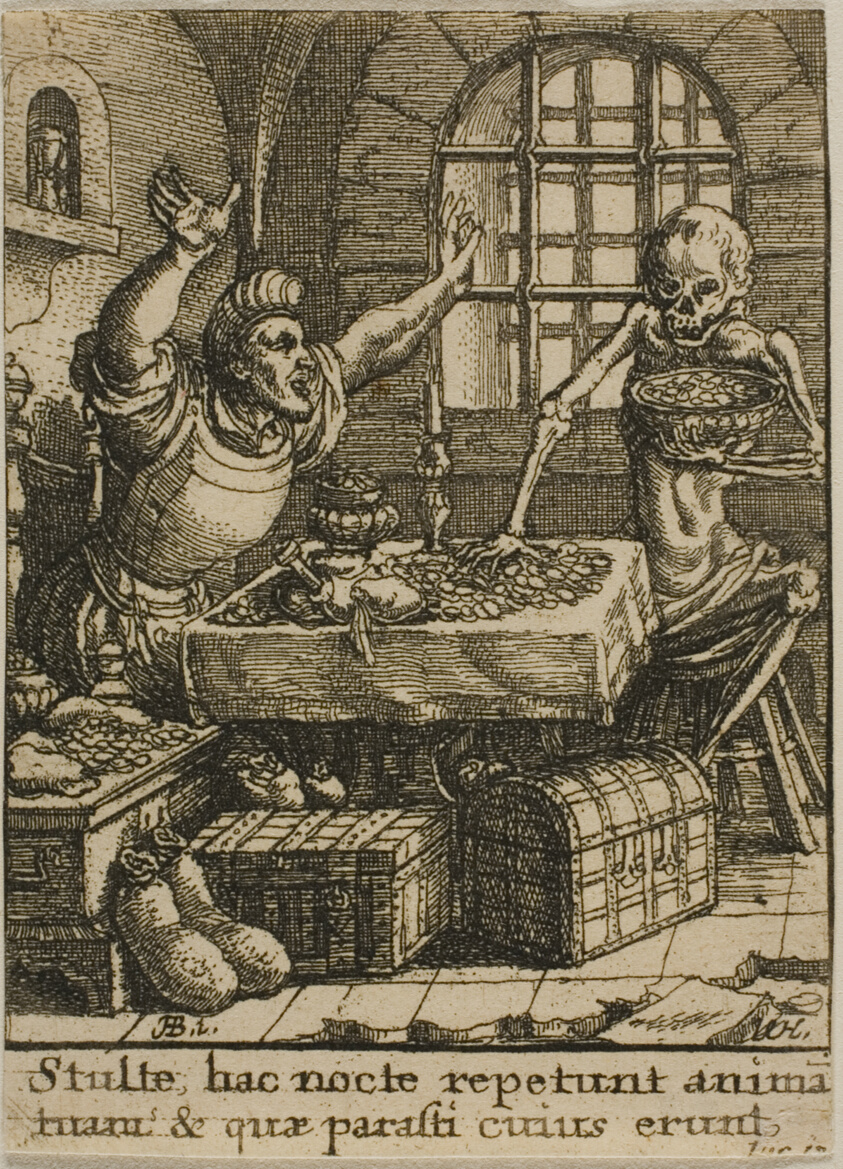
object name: Print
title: The Rich Man and Death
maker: Wenceslaus Hollar (Bohemian, 1607-1677); after Hans Holbein the younger (German, c.1497-1543)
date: 1651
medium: Etching on ivory wove paper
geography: Bohemia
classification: etching; print; prints and drawing